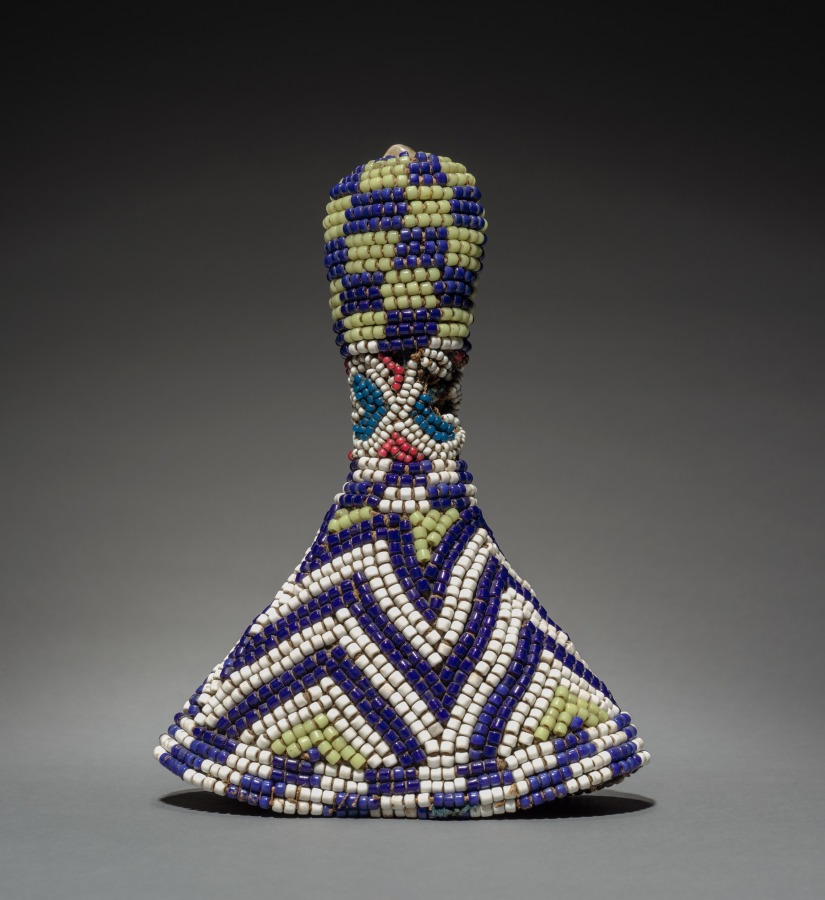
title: Beaded Hat or Headpiece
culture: Africa, Central Africa, Democratic Republic of the Congo, Kuba, 20th century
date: early 1900's?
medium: Glass beads, cloth, plant fiber, and cowrie shells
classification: Garment